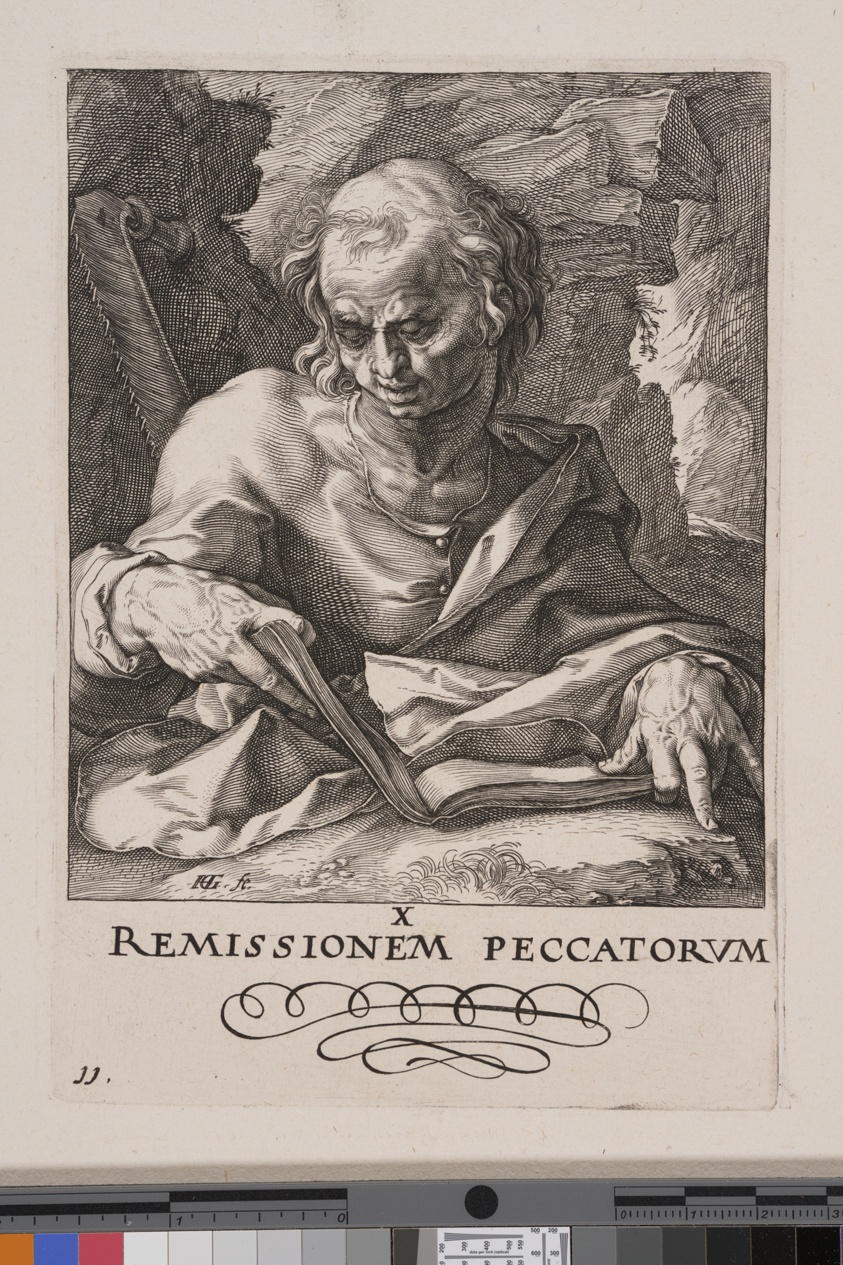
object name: Print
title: St Simon, from Christ, the Apostles and St Paul with the Creed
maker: Hendrick Goltzius (Dutch, 1558–1617)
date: 1589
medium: Engraving on ivory laid paper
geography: Netherlands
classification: print; paper; prints and drawing; engraving